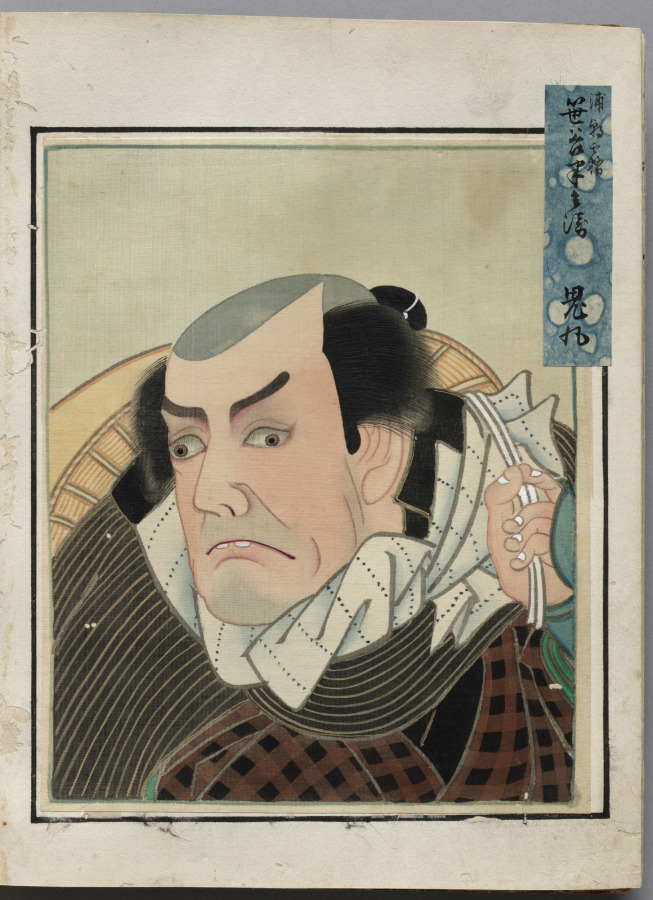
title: Double-Leaf from Album of Actor Portraits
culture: Japan, Edo period (1615–1868)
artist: Shōrakusai (Japanese)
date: c. 1790–1810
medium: double-leaf from an accordion-style album; ink and color on silk (right) and ink on paper (left)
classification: Bound Volume